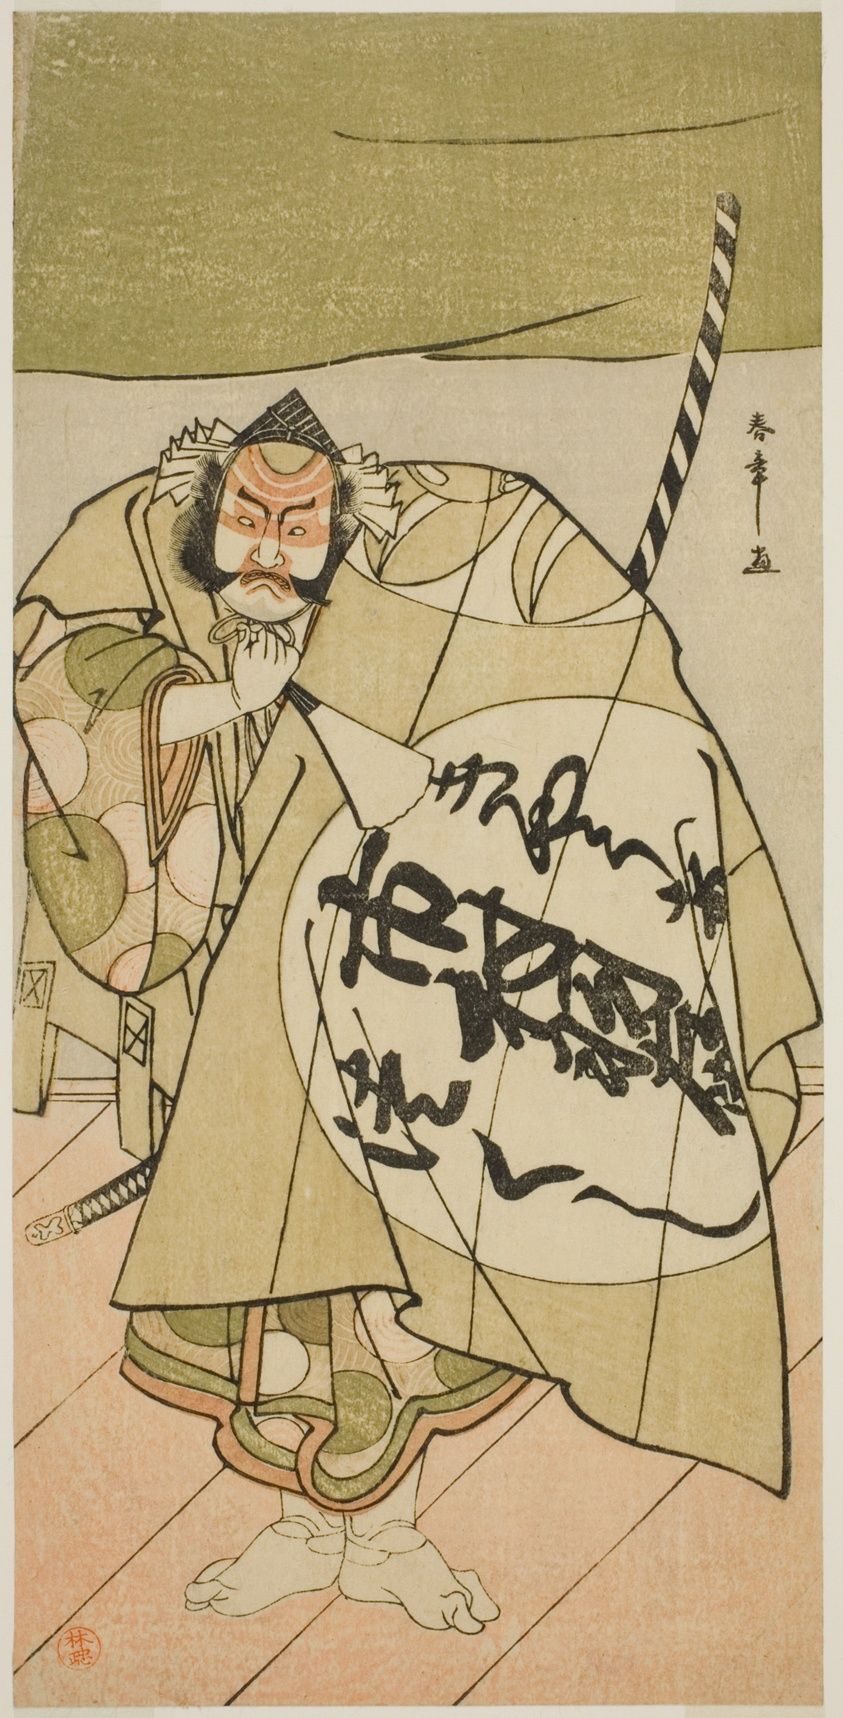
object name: Print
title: The Actor Ichimura Uzaemon IX as Asahina no Sabura in the Play Tsukisenu Haru Hagoromo Soga, Performed at the Ichimura Theater in the First Month, 1777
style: Japanese (culture or style)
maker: Katsukawa Shunsho 勝川 春章; Japanese, 1726-1792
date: c. 1777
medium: Color woodblock print; hosoban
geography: Japan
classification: woodblock print; print; asian art